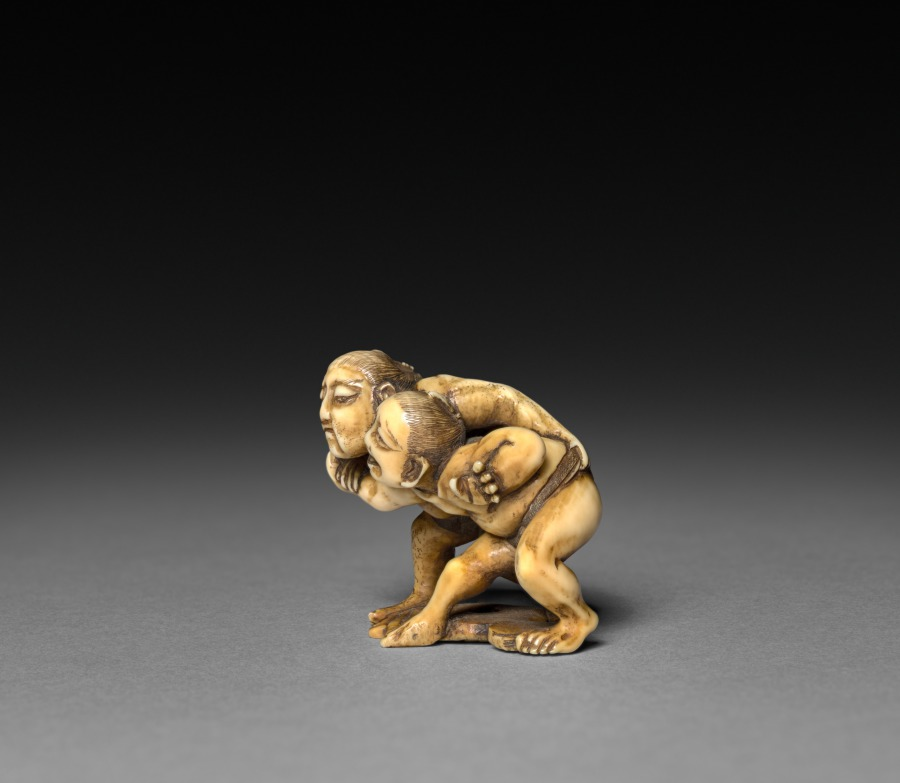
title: Two Wrestlers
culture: Japan, Edo period (1615–1868)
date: early to mid-1800s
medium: ivory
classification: Netsuke